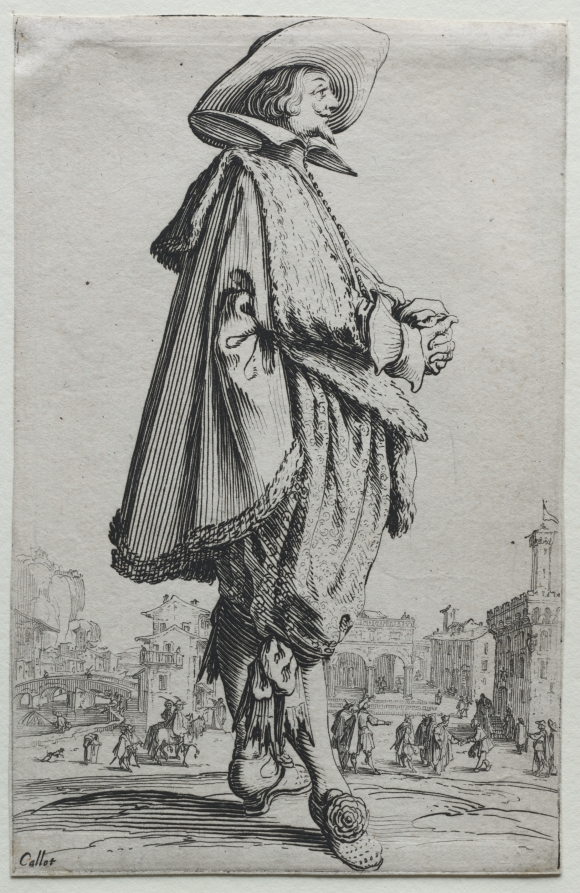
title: La Noblesse: Gentleman Standing in Profile with Clasped Hands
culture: France, 17th century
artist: Jacques Callot (French, 1592–1635)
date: 1620–23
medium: etching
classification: Print